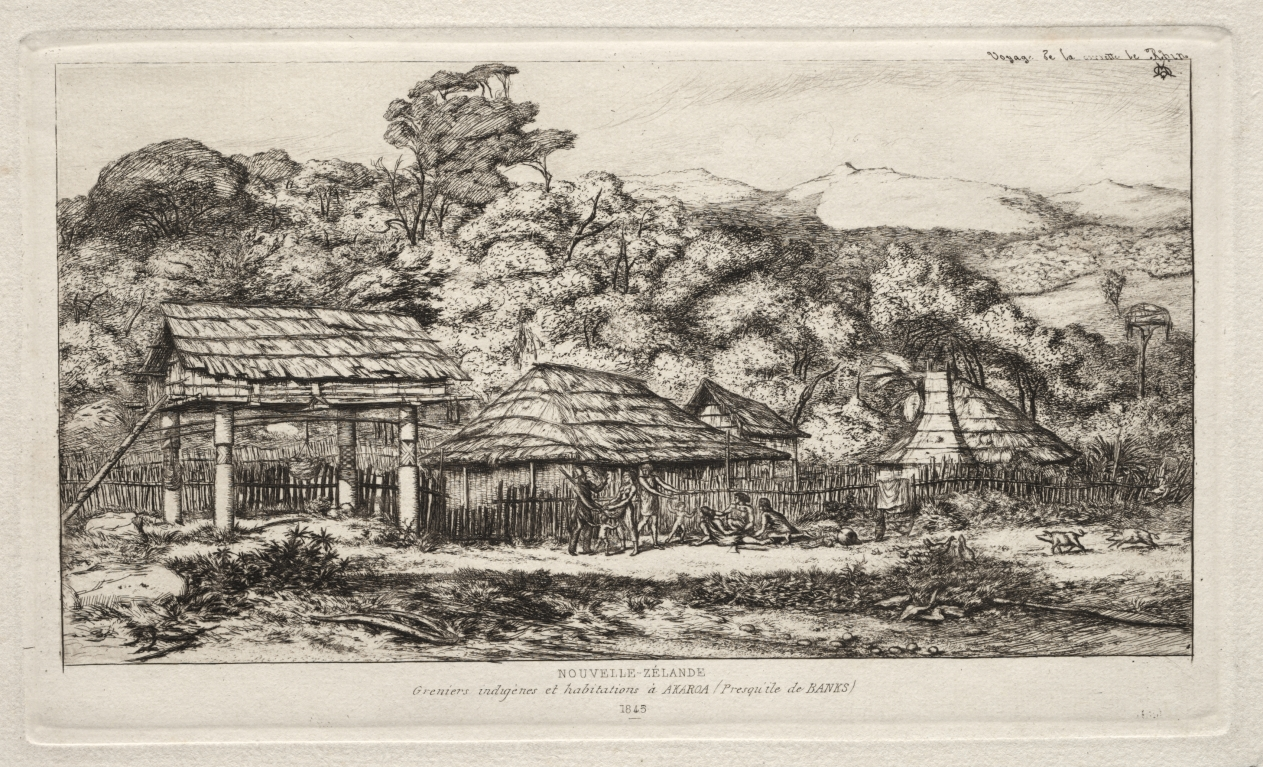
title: Native Barns and Huts at Akaroa, Banks' Peninsula, 1845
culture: France, 19th century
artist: Charles Meryon (French, 1821–1868)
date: 1865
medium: etching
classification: Print